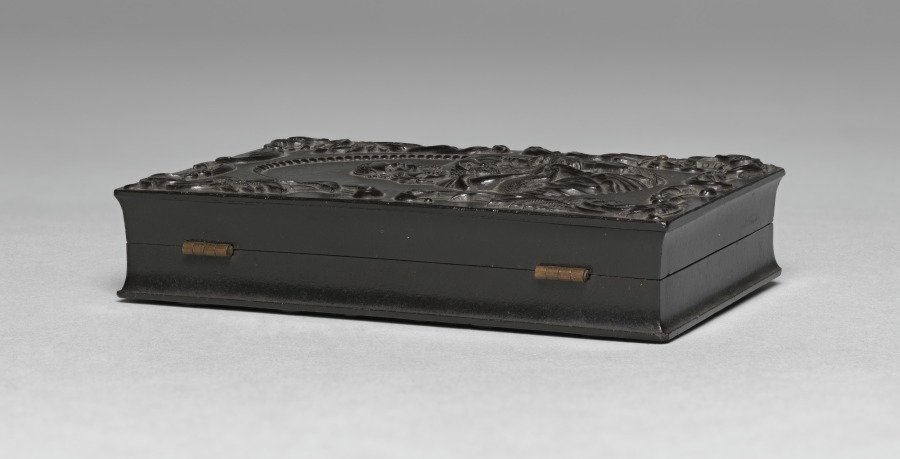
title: Husband and Wife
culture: America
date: c. 1860–65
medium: Two ambrotypes with hand-tinting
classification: Photograph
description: You rarely see a smiling portrait from the mid-19th century. Having your photograph taken was a serious and rare endeavor, plus it was difficult to hold any animated expression long enough for the exposure times required by the early processes. Sitters were instructed to find ways to keep from moving, such as clasping their hands. The woman here has taken the photographers’ cautions to an extreme, resulting in a tense and unflattering portrait.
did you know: In the early decades of photography, many people did not know how to pose for the camera.